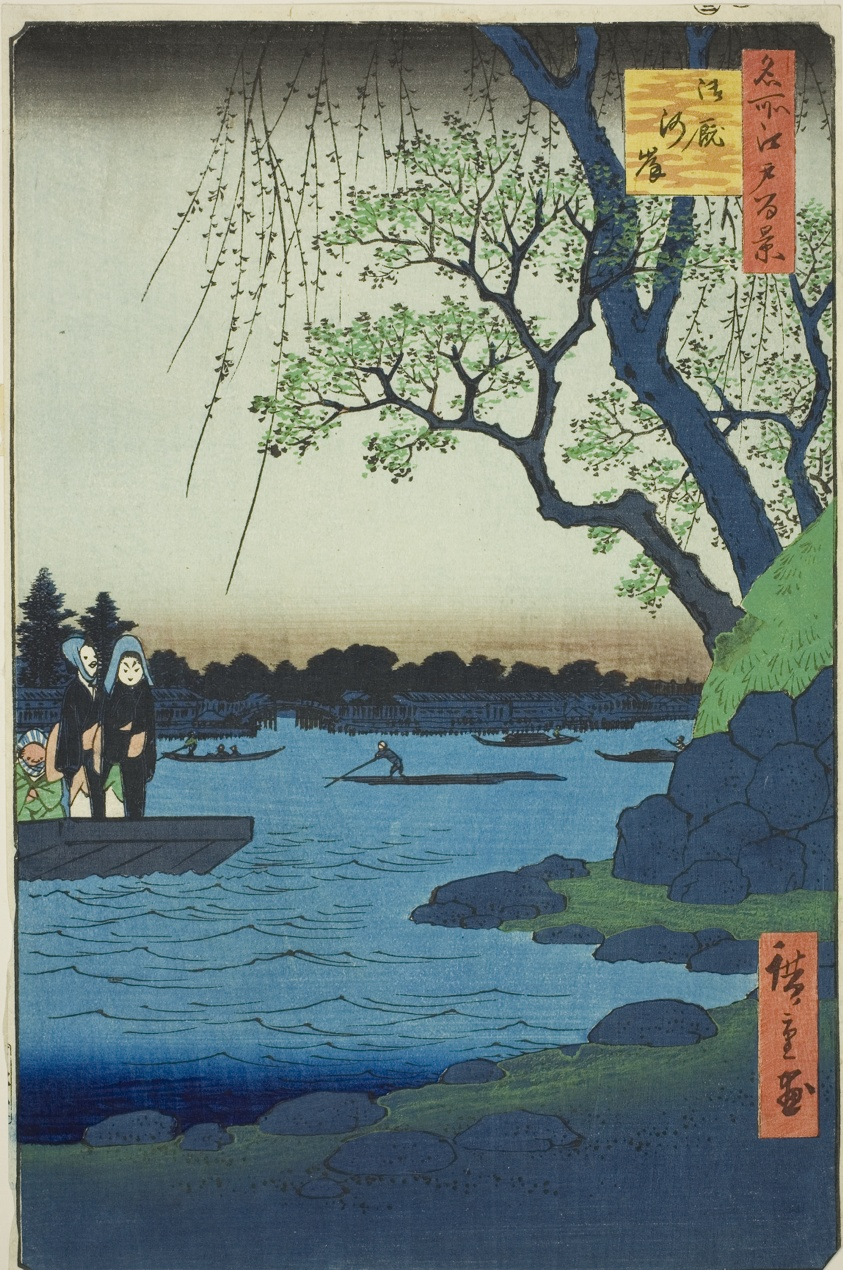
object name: Print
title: Oumayagashi, from the series "One Hundred Famous Views of Edo (Meisho Edo hyakkei)"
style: Japanese (culture or style)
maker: Utagawa Hiroshige 歌川 広重; Japanese, 1797-1858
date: 1857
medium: Color woodblock print; oban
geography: Japan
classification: woodblock print; print; asian art